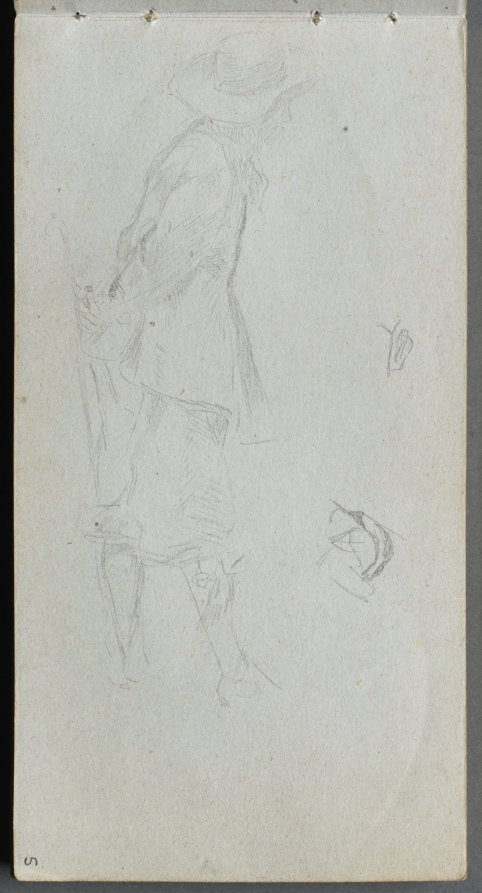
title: Sketchbook, page 5: Figure Study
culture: France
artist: Ernest Meissonier (French, 1815–1891)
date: c. 1860s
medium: graphite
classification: Bound Volume